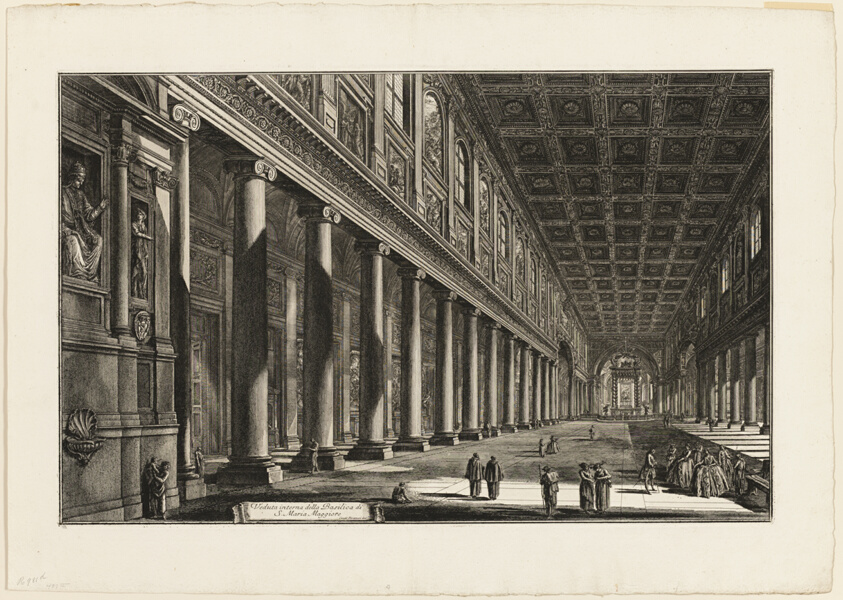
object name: Print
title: Interior view of the Basilica of S. Maria Maggiore, from Views of Rome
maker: Giovanni Battista Piranesi (Italian, 1720-1778); published by Francesco (Italian, 1758-1810) and Pietro Piranesi (Italian, born 1758/9)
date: 1768, published 1800–07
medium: Etching on heavy ivory laid paper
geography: Italy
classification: etching; print; prints and drawing